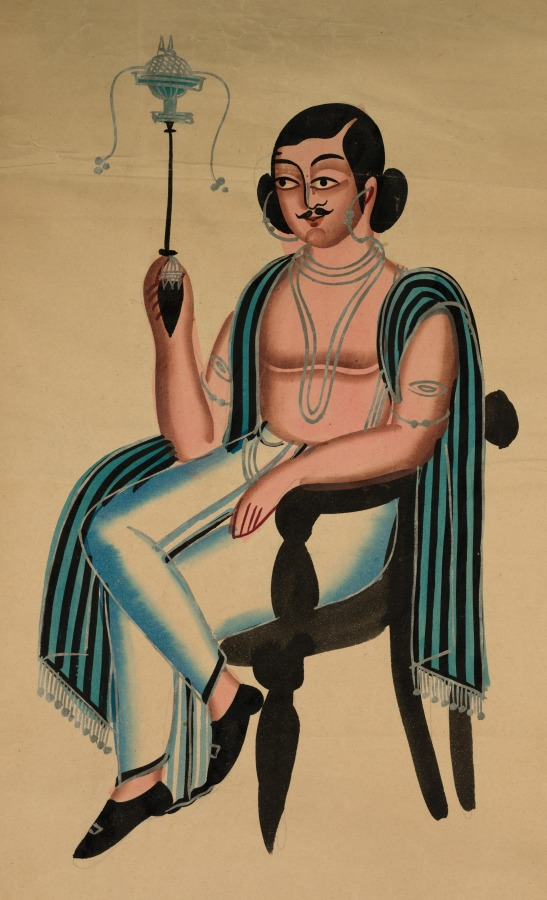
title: Man Seated in a European Chair Smoking a Margila Pipe, from a Kalighat album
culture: Eastern India, Bengal, Kolkata, Kalighat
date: c. 1880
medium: Gum tempera, graphite, and ink on paper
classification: Painting